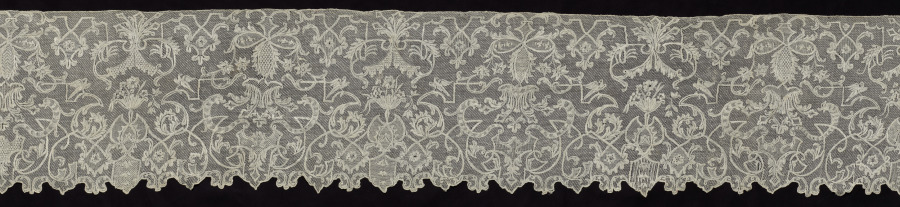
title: Lace Flounce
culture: England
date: 1680s–1790s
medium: Linen: needle lace (drawnwork) and embroidery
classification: Lace